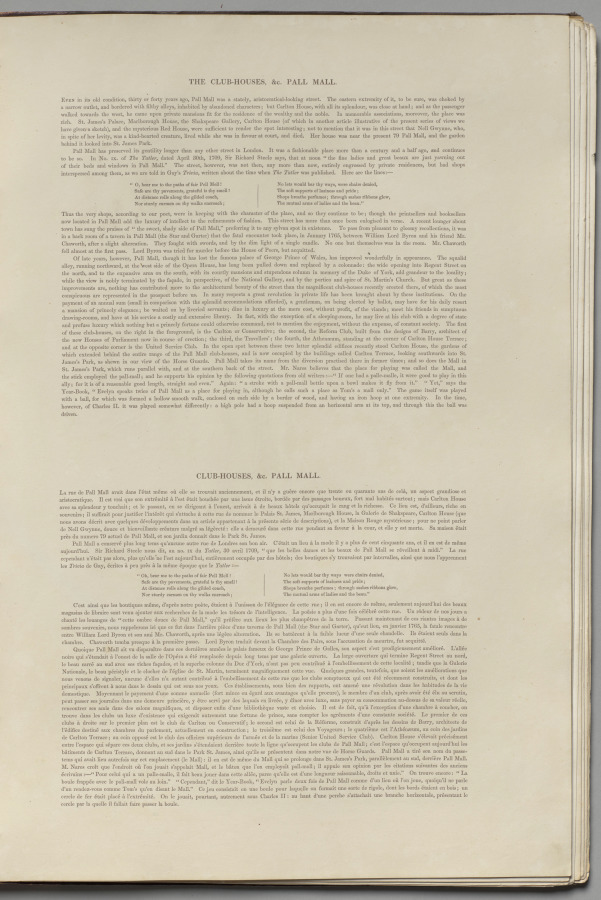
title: London As It Is: The Club-Houses, Pall Mall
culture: England, 19th century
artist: Thomas Shotter Boys (British, 1803–1874)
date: 1842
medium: lithograph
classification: Bound Volume